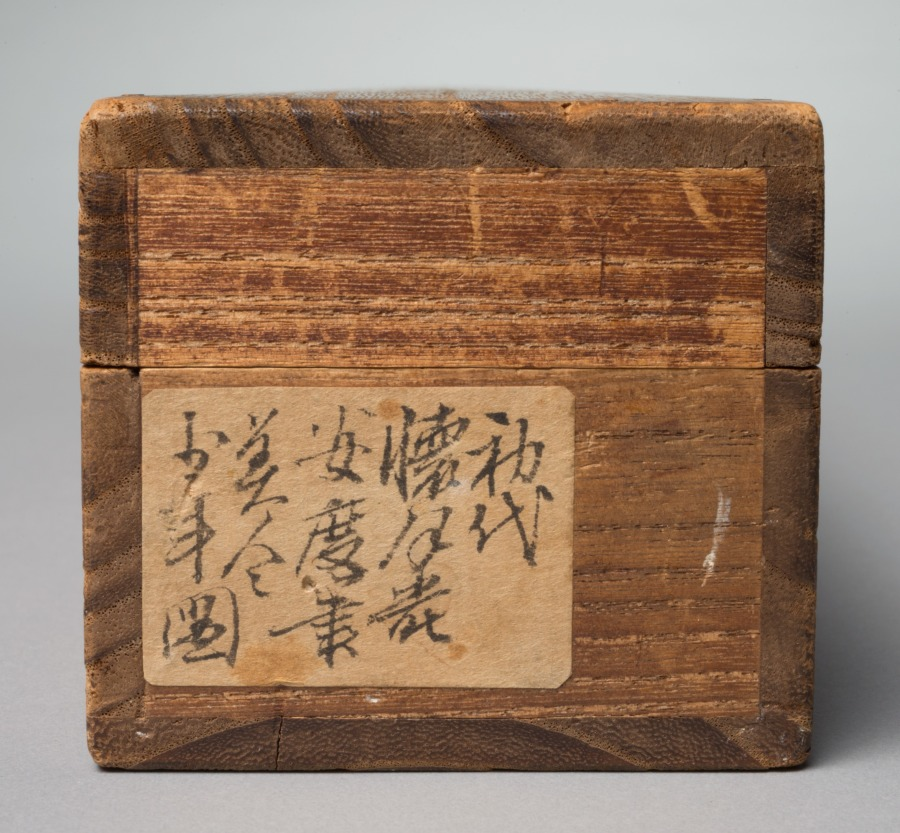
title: Departure from Kashima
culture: Japan, Nanbokuchō period (1336–92)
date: 1336–92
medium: hanging scroll; ink and color on silk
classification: Painting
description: The kami Takemikazuchi from Kashima (in present-day Ibaraki Prefecture) departs on a white deer for Mount Mikasa in Nara, where he takes up residence. The five Kasuga kami are presented within a golden circle supported by the branches of a sakaki tree, from which trail five white paper streamers—indicating the purity and sacredness of the five shrine halls of the complex—as well as blossoming wisteria vines, a symbol of the Fujiwara family. The two figures walking along near the stag’s back legs are Nakatomi no Tokifū and his younger brother Hidetsura, who have followed Takemikazuchi and become priests of Kasuga Taisha.